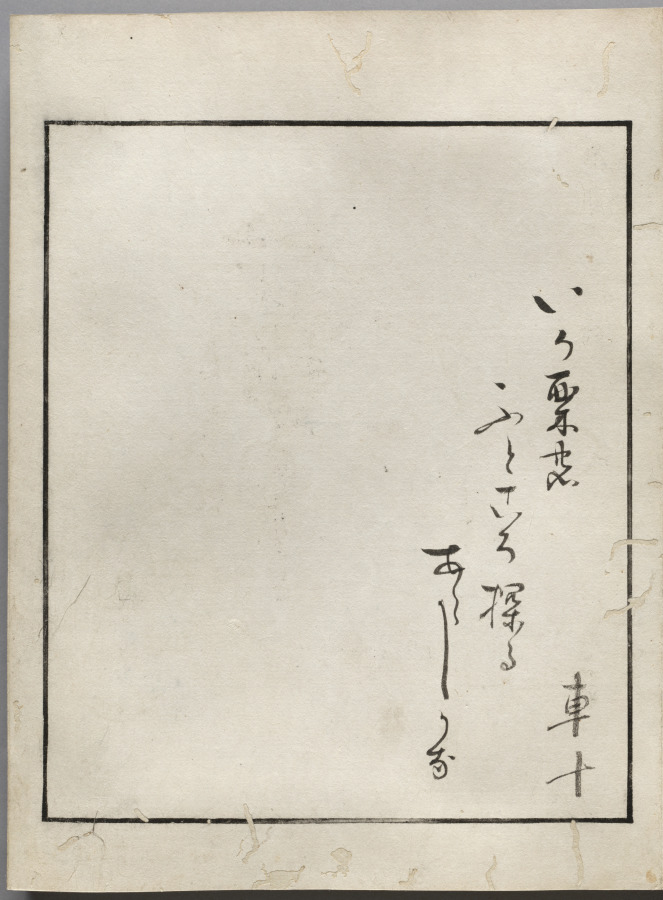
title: Double-Leaf from Album of Actor Portraits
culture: Japan, Edo period (1615–1868)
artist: Shōrakusai (Japanese)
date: c. 1790–1810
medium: double-leaf from an accordion-style album; ink and color on silk (right) and ink on paper (left)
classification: Bound Volume